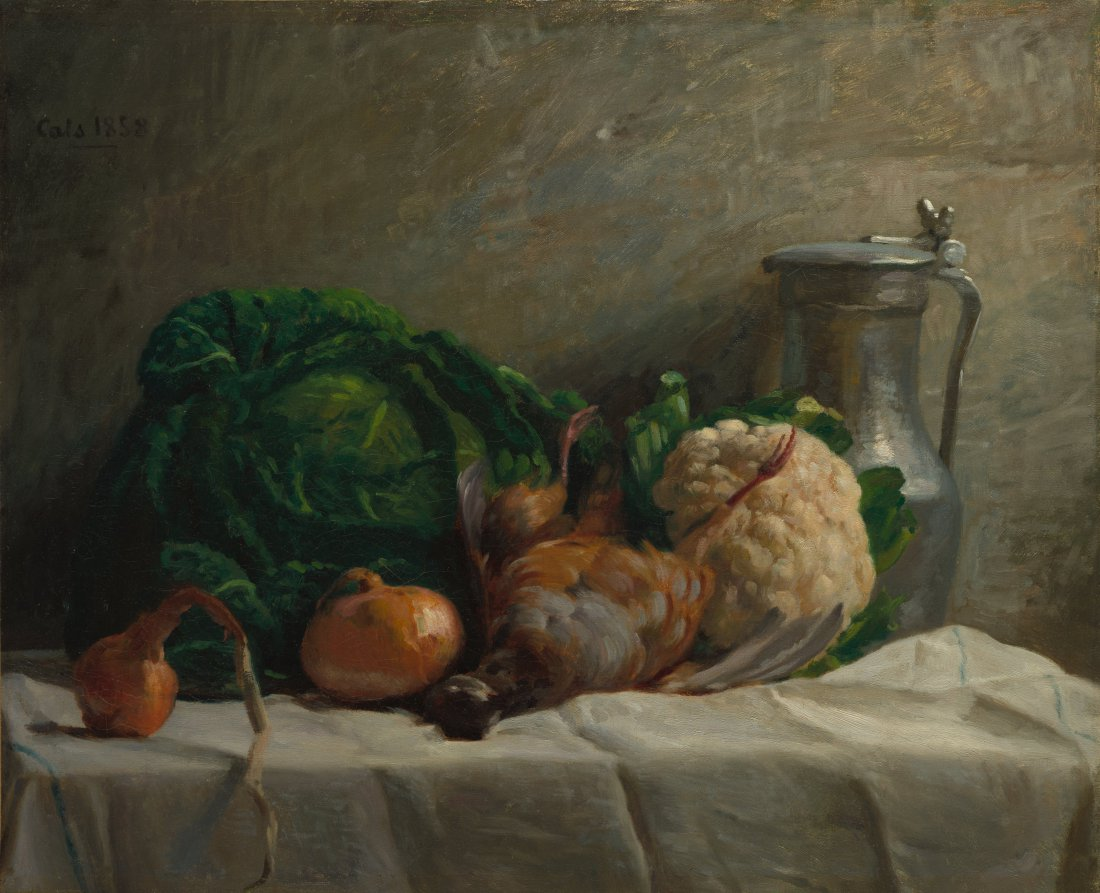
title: Still Life with Vegetables, Partridge, and a Jug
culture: France, 19th century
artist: Adolphe-Félix Cals (French, 1810–1880)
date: 1858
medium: oil on fabric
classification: Painting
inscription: Signed upper left: Cals 1858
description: During the 19th century, a number of painters used common objects (rather than rare or refined objects) to create still lifes that some critics judged as unfit for the drawing room: studies of carrots, cabbages, asparagus, oysters, onions, eggs, and cooking utensils. Often these subjects were chosen for their mealtime associations. The food represented on the table in this painting—a partridge, onions, and cabbage—are the main ingredients for the well-known dish perdrix au chou (partridge with cabbage). Cals, however, was also interested in exploring underlying compositional design principles and studying the shapes of the objects he depicted. Cals lived and worked in and around Paris for most of his life, though in 1871 he moved to Normandy. In 1874 he participated in the first Impressionist exhibition and continued to do so until 1879. Although still lifes were an important part of his production, they were not his specialty. He preferred to work outdoors, in places chosen during his daily strolls. Art critic Edmond About, who was usually not very generous with compliments, characterized Cals as the most sincere and genuine artist he had ever known.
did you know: In this painting, Cals even includes the metal pitcher that holds the liquid in which the perdrix au chou (partridge with cabbage) will be cooked.